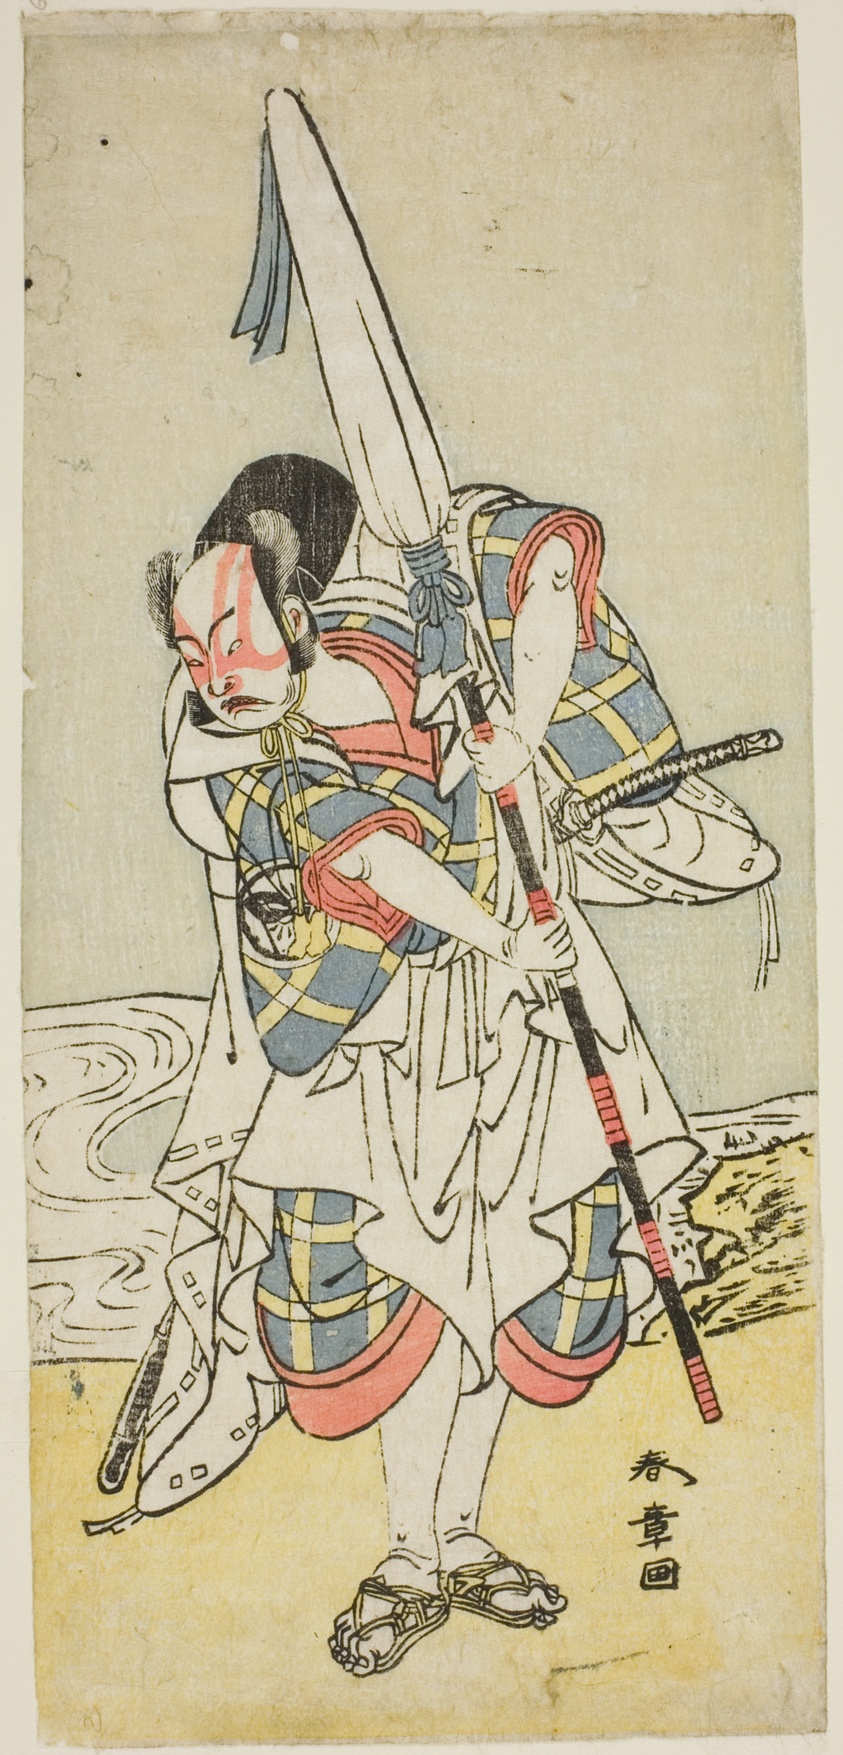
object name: Print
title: The Actor Nakamura Juzo II as Asahara Hachiro disguised as the servant of a princely family, from the play "Onna Aruji Hatsuyuki no Sekai," performed at the Morita Theater in the eleventh month, 1773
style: Japanese (culture or style)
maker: Katsukawa Shunsho 勝川 春章; Japanese, 1726-1792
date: c. 1773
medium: Color woodblock print; hosoban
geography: Japan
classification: woodblock print; print; asian art